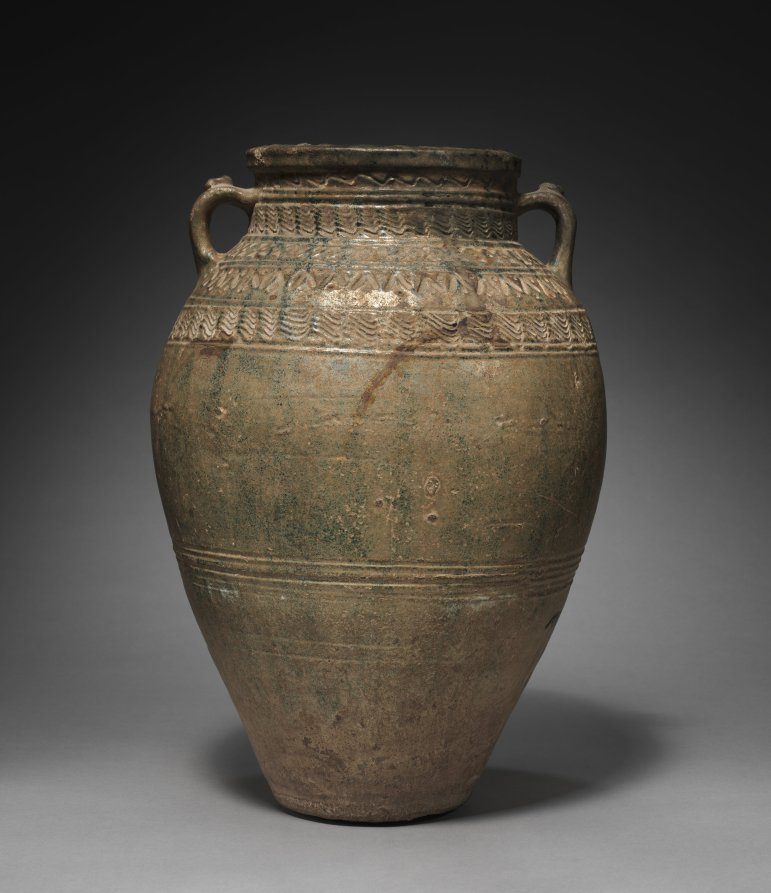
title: Jar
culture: Iran, Sasanian Empire (224–651 CE)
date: 222–650 CE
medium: earthenware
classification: Ceramic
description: Simply decorated with bands of wavy and dotted sawtooth patterns on the neck and shoulder, this large jar features two small handles for lifting and a wide mouth for easy access to its contents. A shiny glaze covers the exterior surface.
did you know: This large vessel was thrown in three or four sections.